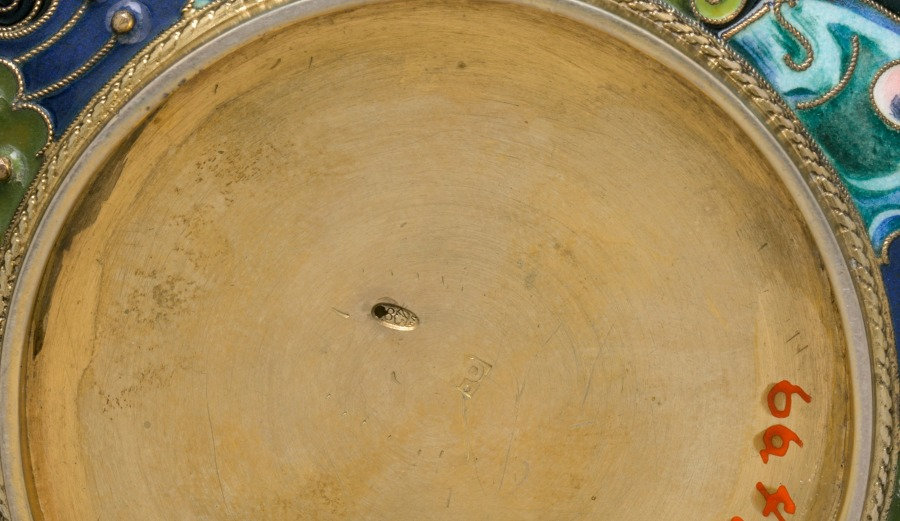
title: Kovsh (Wine Vessel)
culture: Russia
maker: House of Fabergé (Russian, 1842–1918)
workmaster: attributed to Feodor Ivanovich Rückert (Russian, 1840–1917)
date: 1896–1906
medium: silver gilt, enamel, cabochon gems, chrysoprases, carnelians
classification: Miscellaneous